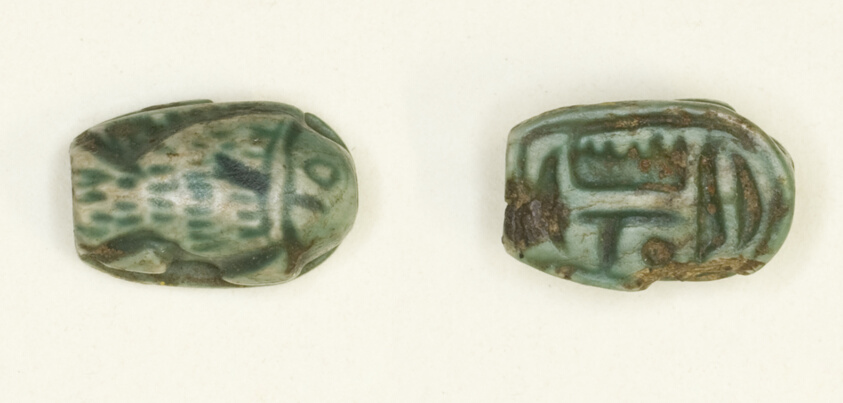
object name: Costume and Accessories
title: Scaraboid: Fish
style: new kingdom, egyptian, ancient, eighteenth dynasty, nineteenth dynasty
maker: Egyptian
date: New Kingdom, Dynasties 18–19 (about 1550–1186 BCE)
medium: Glazed steatite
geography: Egypt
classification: scaraboids; amulet; ancient art; costume; seal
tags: fish, Hieroglyphs